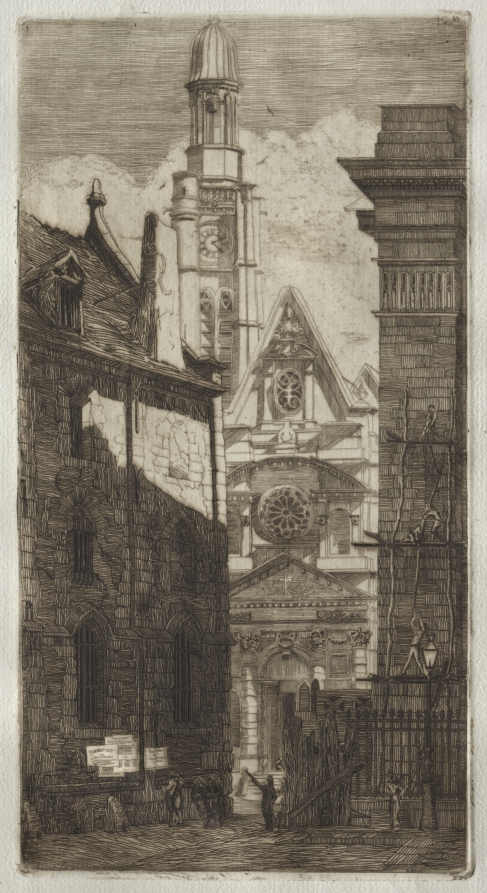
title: Saint-Etienne-du-Mont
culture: France, 19th century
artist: Edmond Gosselin (French)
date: c. 1881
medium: etching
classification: Print